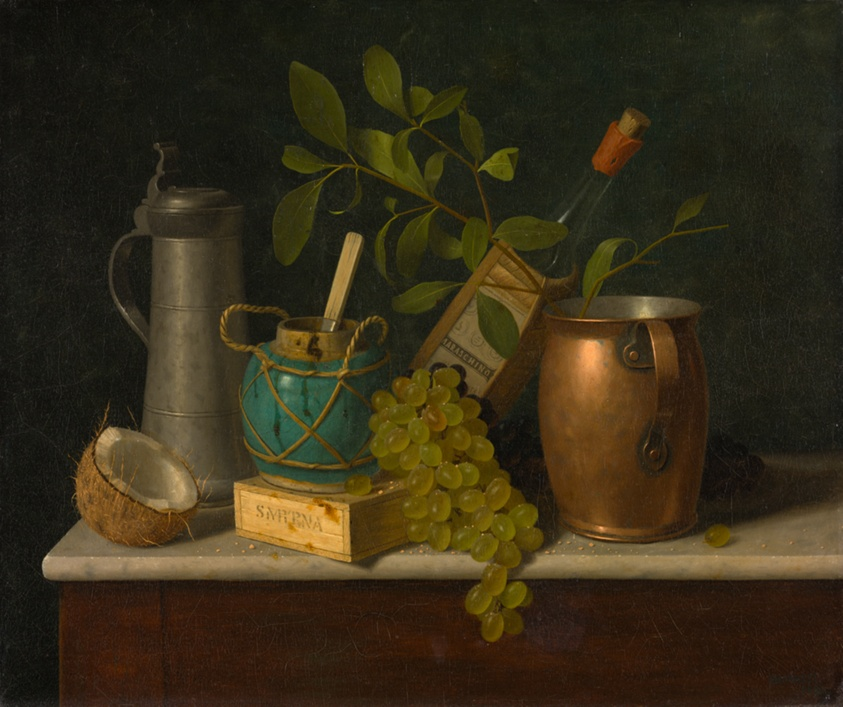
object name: Painting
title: Just Dessert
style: Realism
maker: William Michael Harnett (American, born Ireland, 1848–1892)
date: 1891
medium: Oil on canvas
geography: United States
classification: painting; american arts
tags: still life, dining, drinking